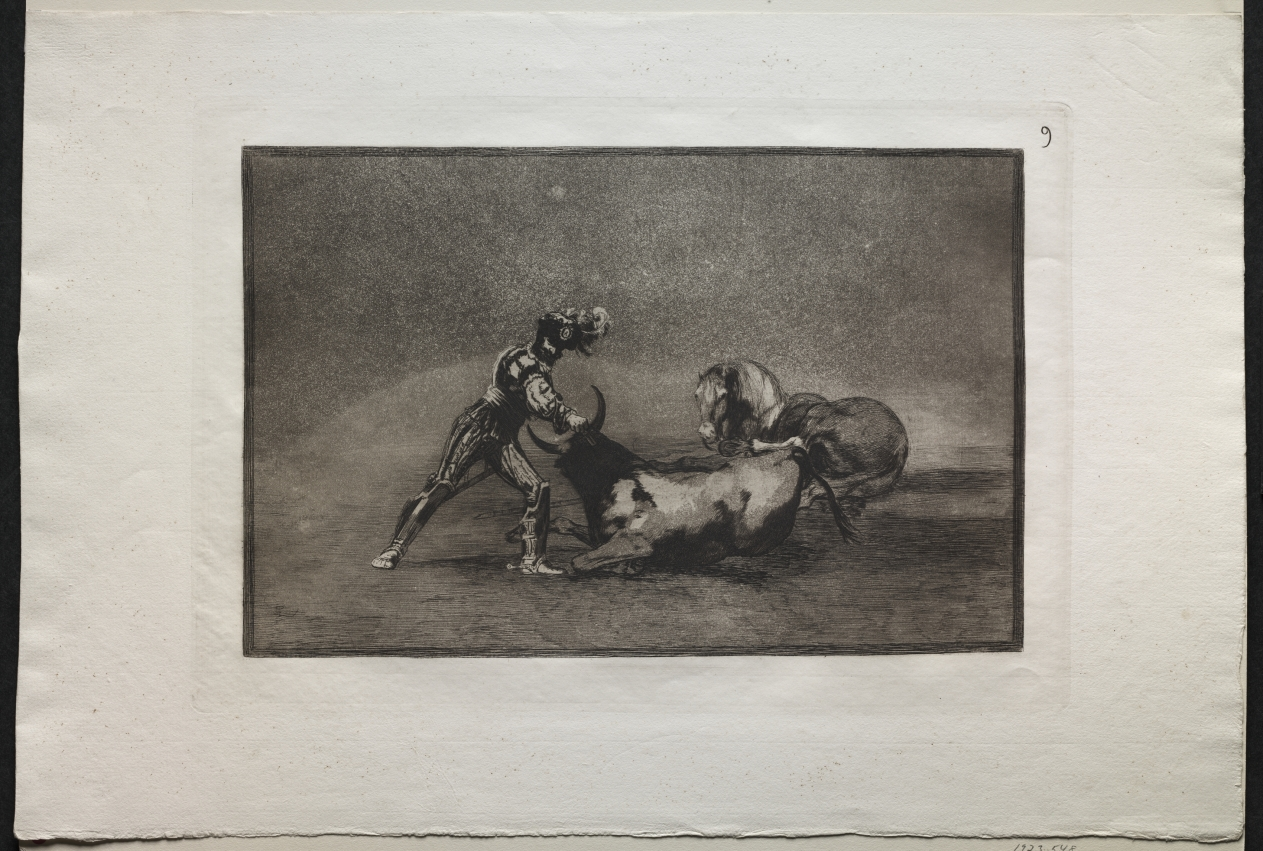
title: Bullfights: A Spanish Knight Kills the Bull After Having Lost His Horse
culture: Spain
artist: Francisco de Goya (Spanish, 1746–1828)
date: 1816, printed 1876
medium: engraving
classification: Print